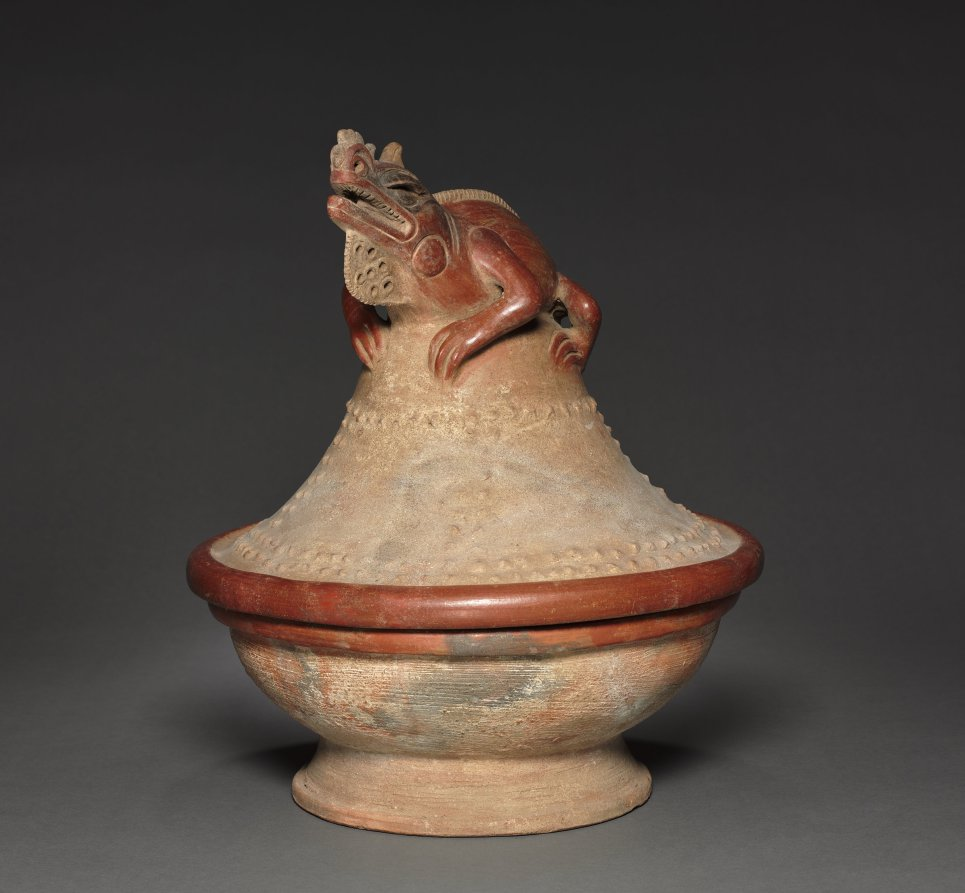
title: Lidded Bowl with Iguana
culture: Costa Rica, Southern Nicoya region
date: c. 600–1100 (Thermoluminescence date, 995–1395)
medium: ceramic, slip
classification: Ceramic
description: At the time of the Spanish conquest in the 16th century, Costa Rican mythology linked iguanas to the sky and to rulers. The earlier makers of this vessel left no written records, but they may have had similar beliefs. The lizard poses as though basking in the sun, a celestial body, and assumes an aggressive stance that could be likened to a ruler's: the teeth and chin under the dewlap are displayed, Also, fine ceramics like this were buried in the graves of the high-status dead, some of them certainly leaders of the several groups that competed in the area.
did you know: Green iguanas can grow to be over 6 feet long.